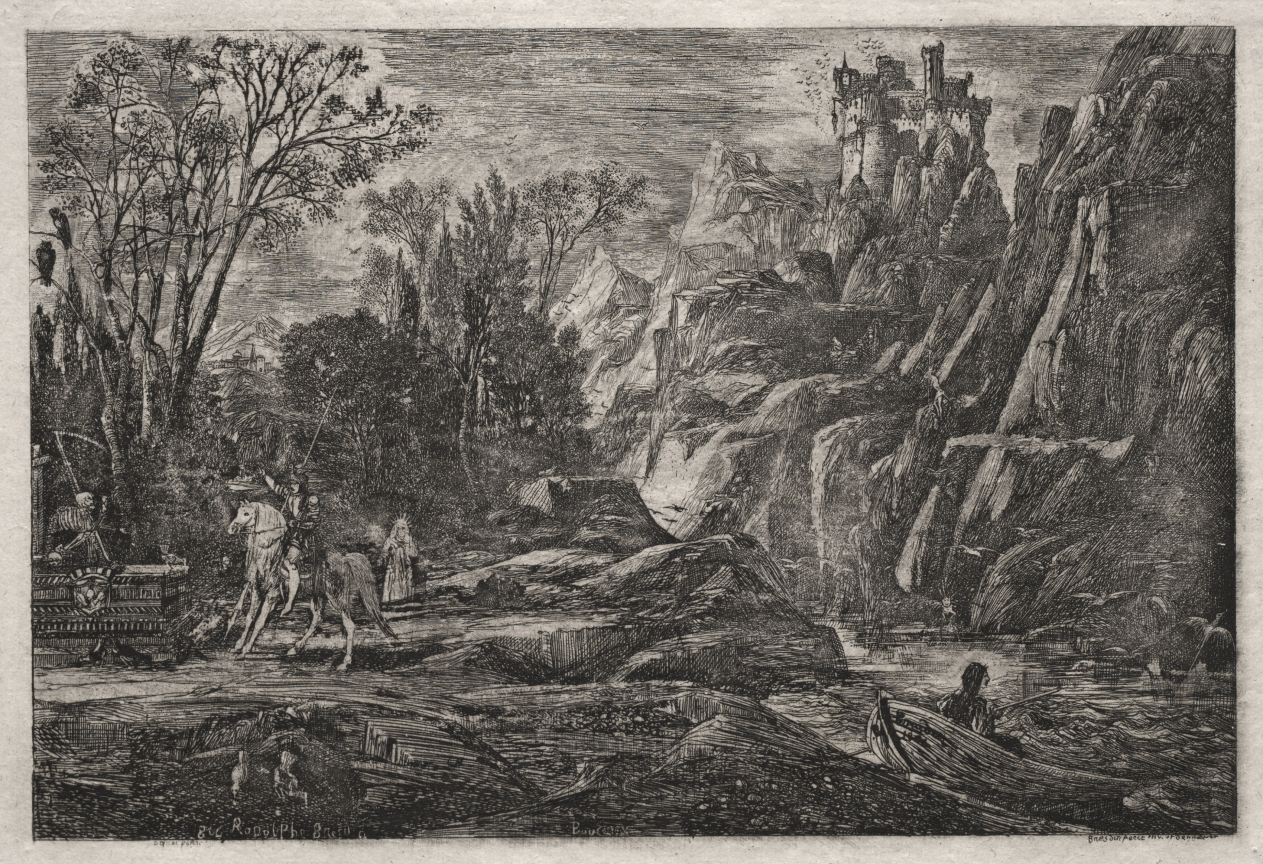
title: The Knight and Death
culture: France, 19th century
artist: Rodolphe Bresdin (French, 1822–1885)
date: 1866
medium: etching and roulette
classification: Print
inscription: signed and dated, lower left, in plate: 1866 Rodolphe Bresdin; lower left, in plate: aqua forti; lower center: Bordeaux; lower right, in plate: Bresdin fecit inv. et delinavit [sic]